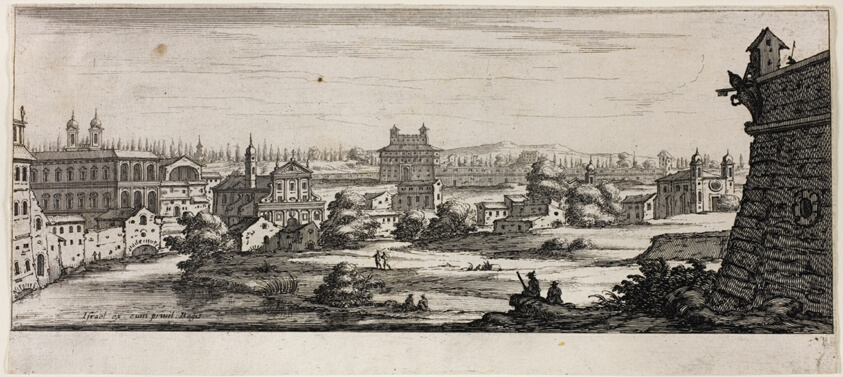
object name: Print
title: View of Rome: Number 12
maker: François Collignon (French, c. 1609-1657)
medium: Etching on ivory laid paper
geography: France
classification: etching; print; prints and drawing